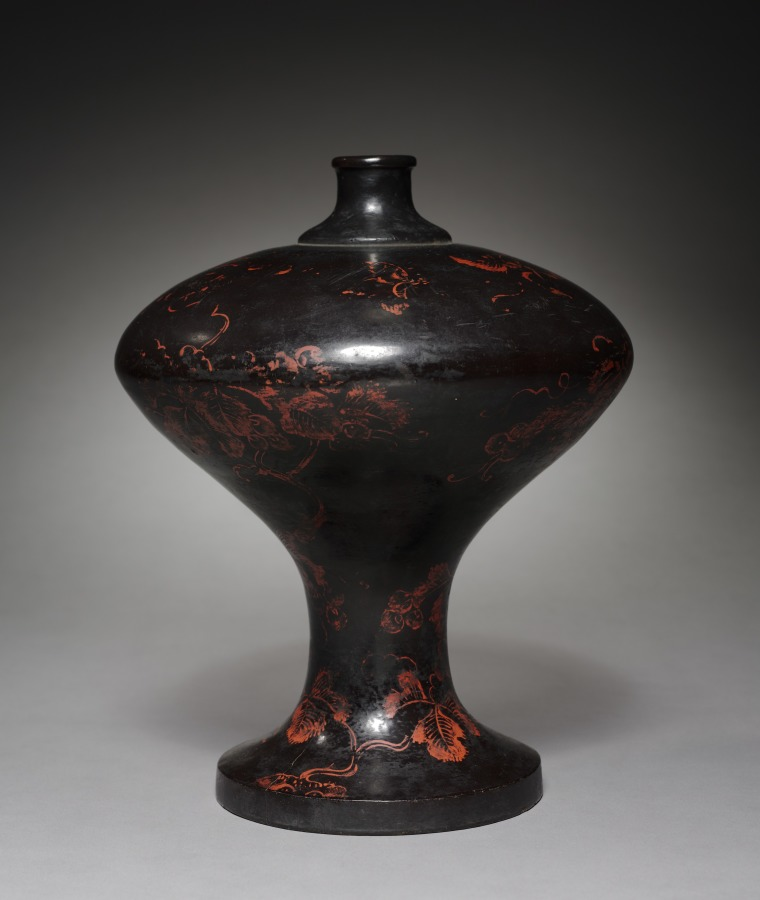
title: Sake Flask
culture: Japan, Muromachi period (1392–1573)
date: 1500s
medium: Black laquered wood with red lacquer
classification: Lacquer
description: This flask contained rice wine, or sake. Its wood body was shaped by a lathe before black lacquer was applied to the surface. A red lacquer design of grapevines, an auspicious motif, covers the surface. With their numerous, long-lasting fruits, grapevines traditionally symbolized fertility and longevity in East Asia.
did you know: The evocative imagery of brushed leaves and bunches of grapes suggest that the artist referred to a particular painting when decorating this vase.